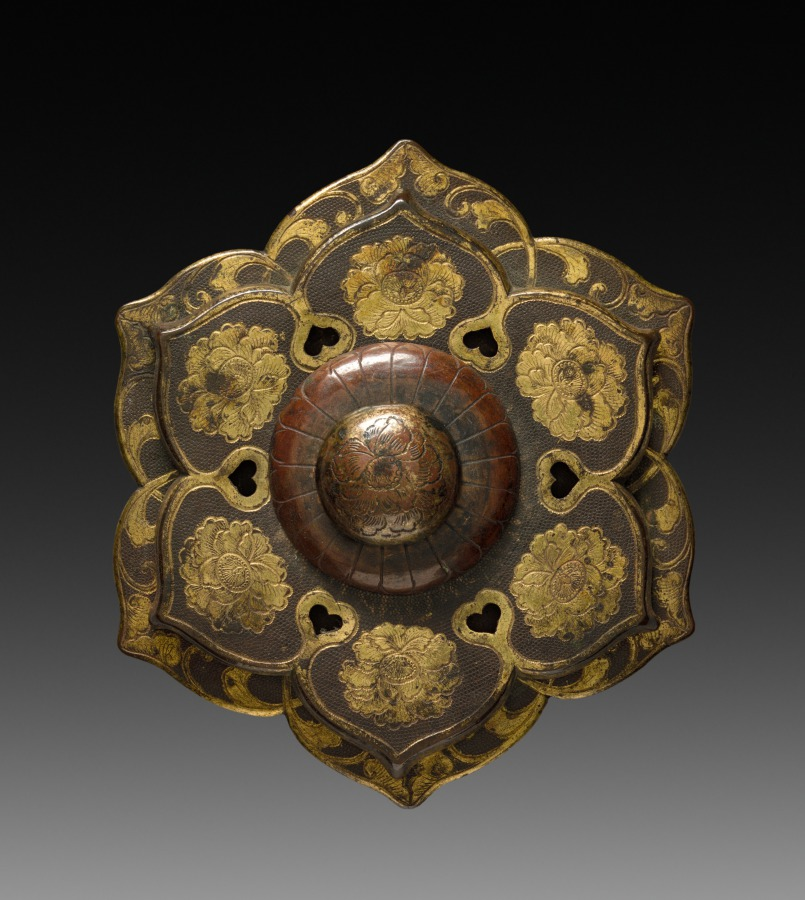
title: Gilt Nail Head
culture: Japan, Edo period (1615–1868)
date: c 1800s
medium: gilt bronze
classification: Metalwork